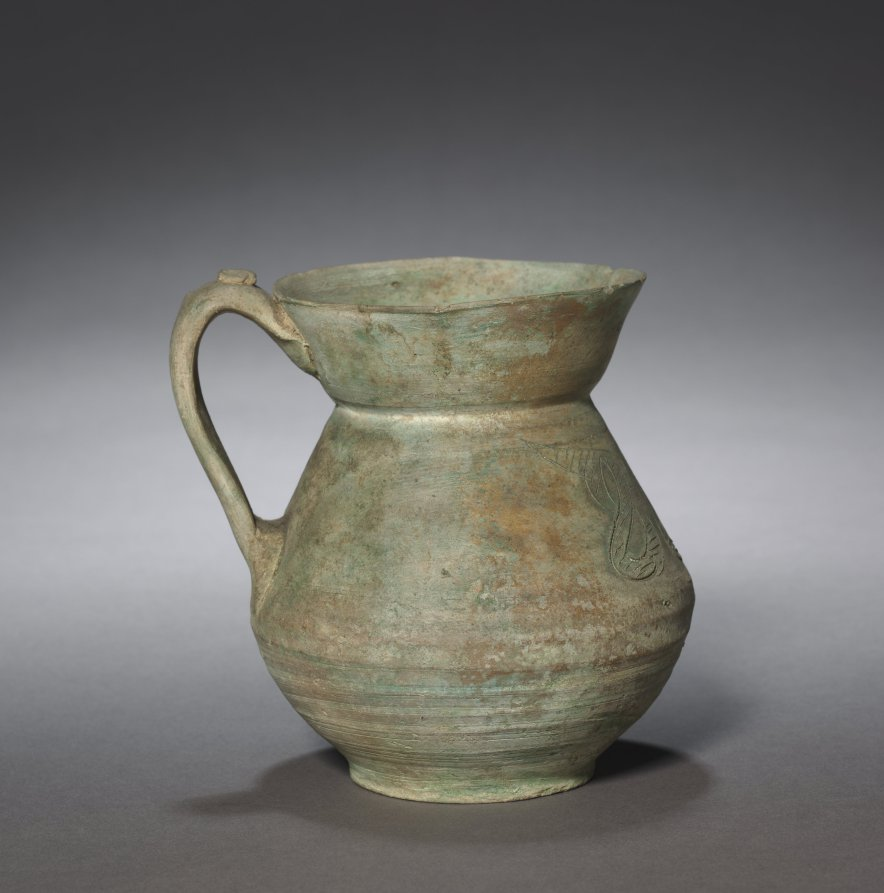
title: Jug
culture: Iran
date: 900s–1100s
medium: earthenware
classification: Ceramic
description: This jug was acquired in 1915, prior to the museum opening.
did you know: The handle has a thumb rest.